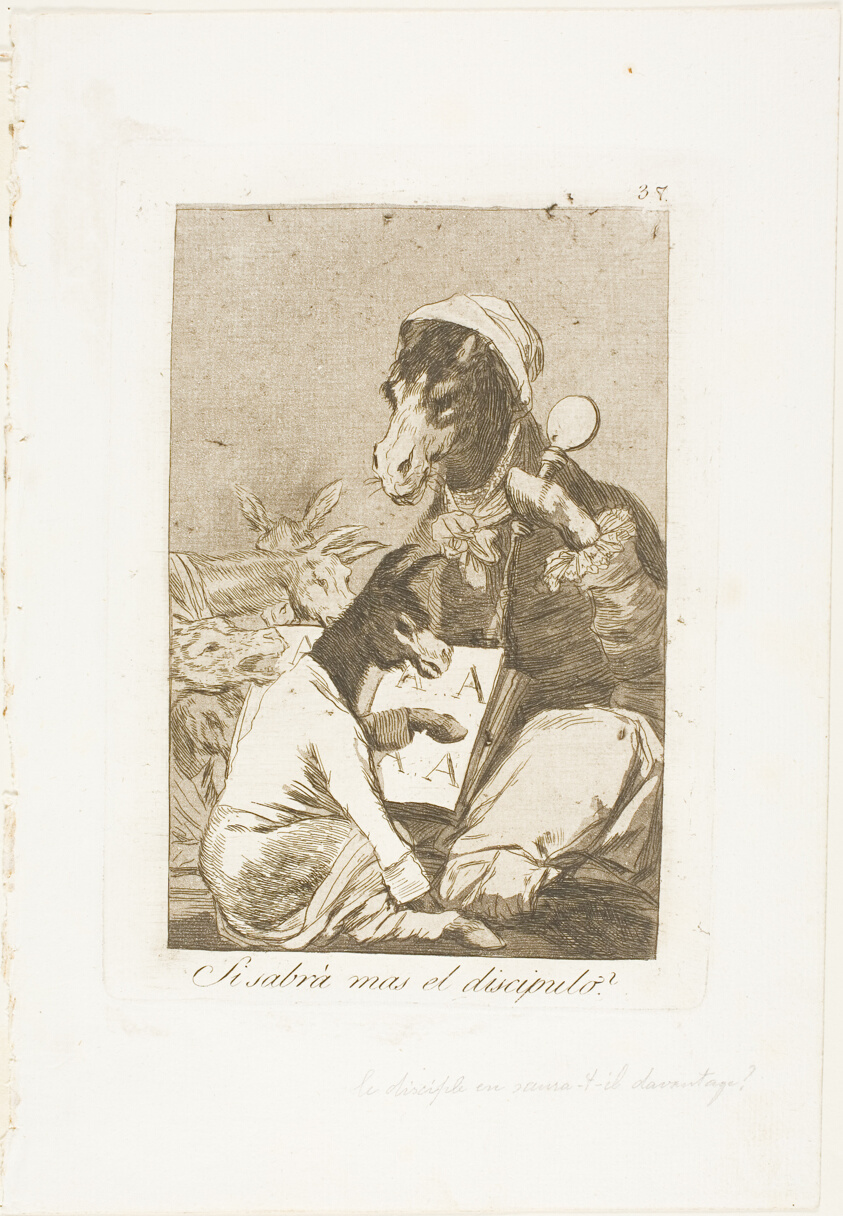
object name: Print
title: Might not the Pupil Know More?, plate 37 from Los Caprichos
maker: Francisco José de Goya y Lucientes (Spanish, 1746-1828)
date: 1797/99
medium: Etching and aquatint on ivory laid paper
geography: Spain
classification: etching; print; prints and drawing